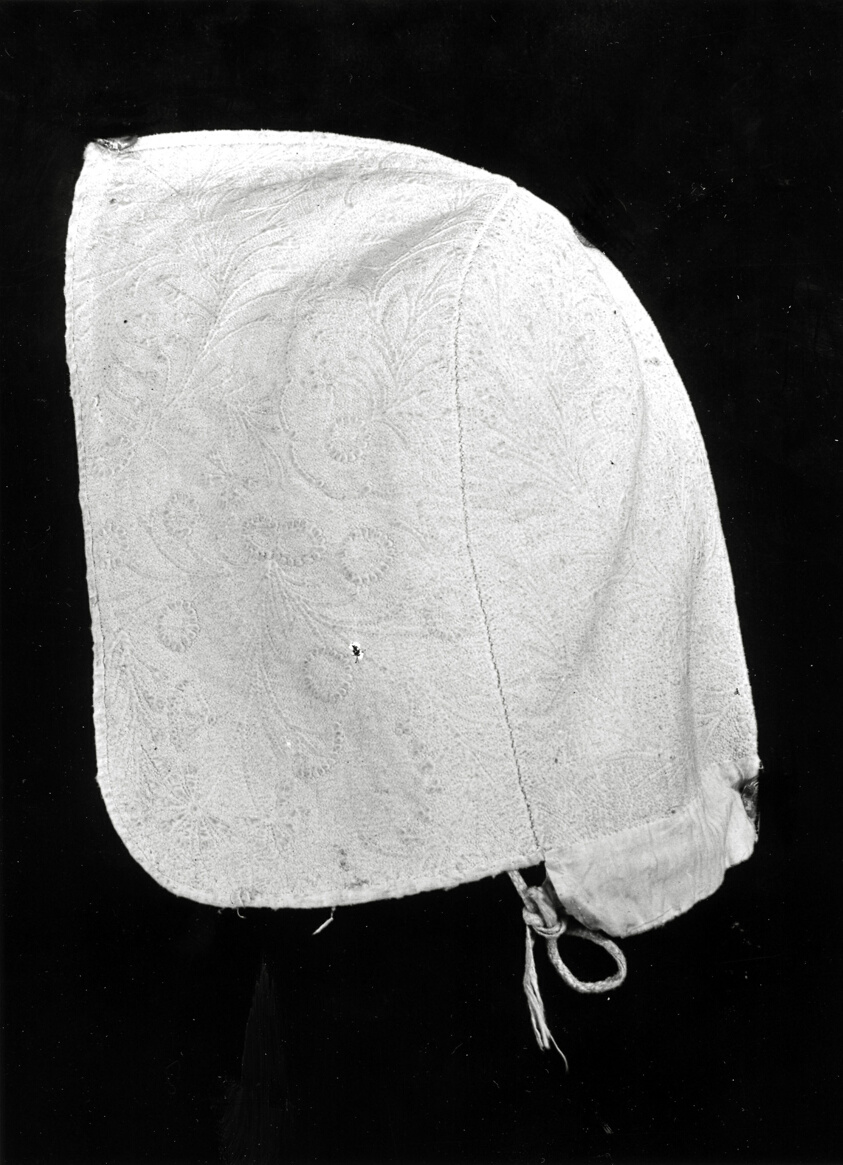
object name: Textile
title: Cap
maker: England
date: 18th century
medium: Linen, plain weave; embroidered with linen threads in back stitch and powdering of back stitches known as Point de Sable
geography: England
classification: textile; headdress - needlework; costume accessory - headdress; costume accessory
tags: fashion